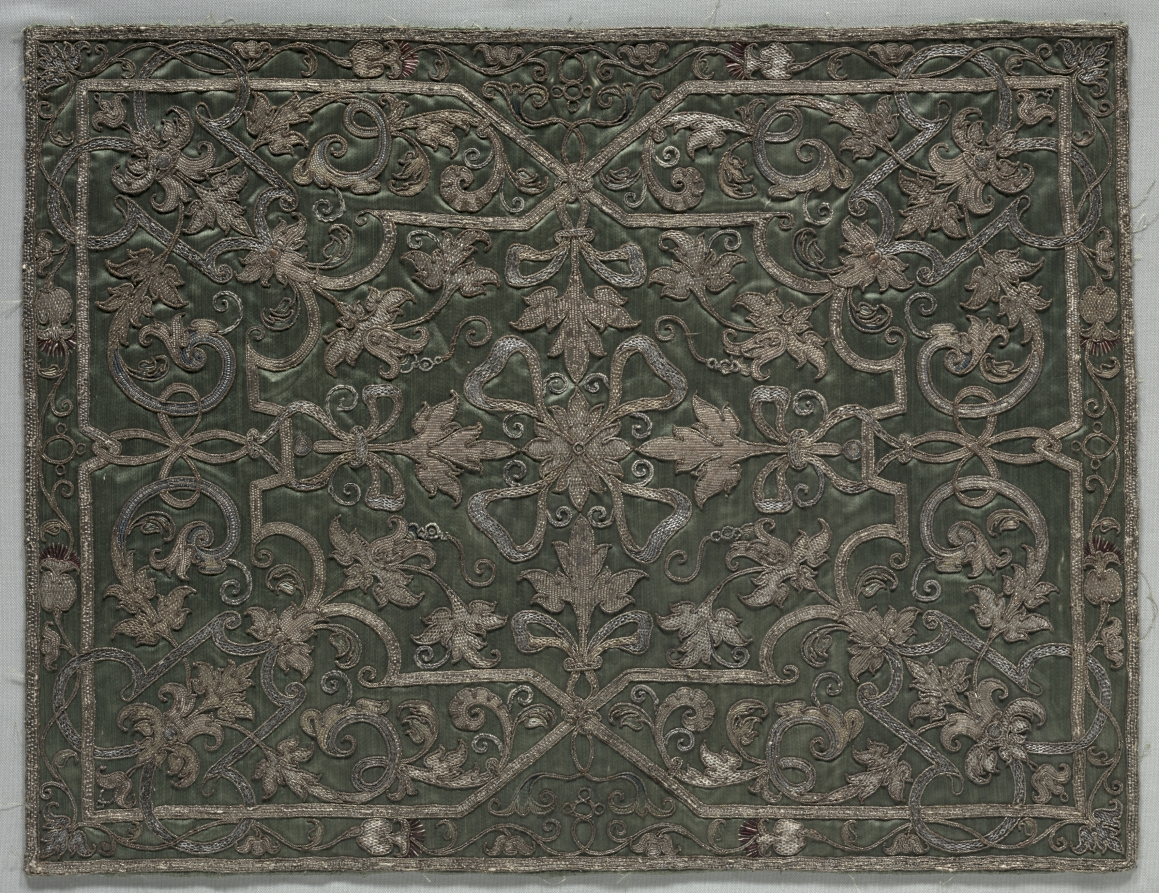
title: Apparel from a Dalmatic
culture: Italy, early 16th century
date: early 1500s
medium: Silk, gold and silver thread; embroidery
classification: Embroidery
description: This lavishly enriched embroidery, known as an apparel, is part of a set that originally embellished a dalmatic, an ecclesiastical garment, one on the front above the hem and another on the back. Gold and silver thread form the striking strapwork, or interlaced scrolls, of blossoms and leaves. The variety of stitches would have made the embroidery sparkle in low light levels, such as in a candlelit church. Some are worked in straight lines, others in curved contours, while still others create more textured basket-weave effects.